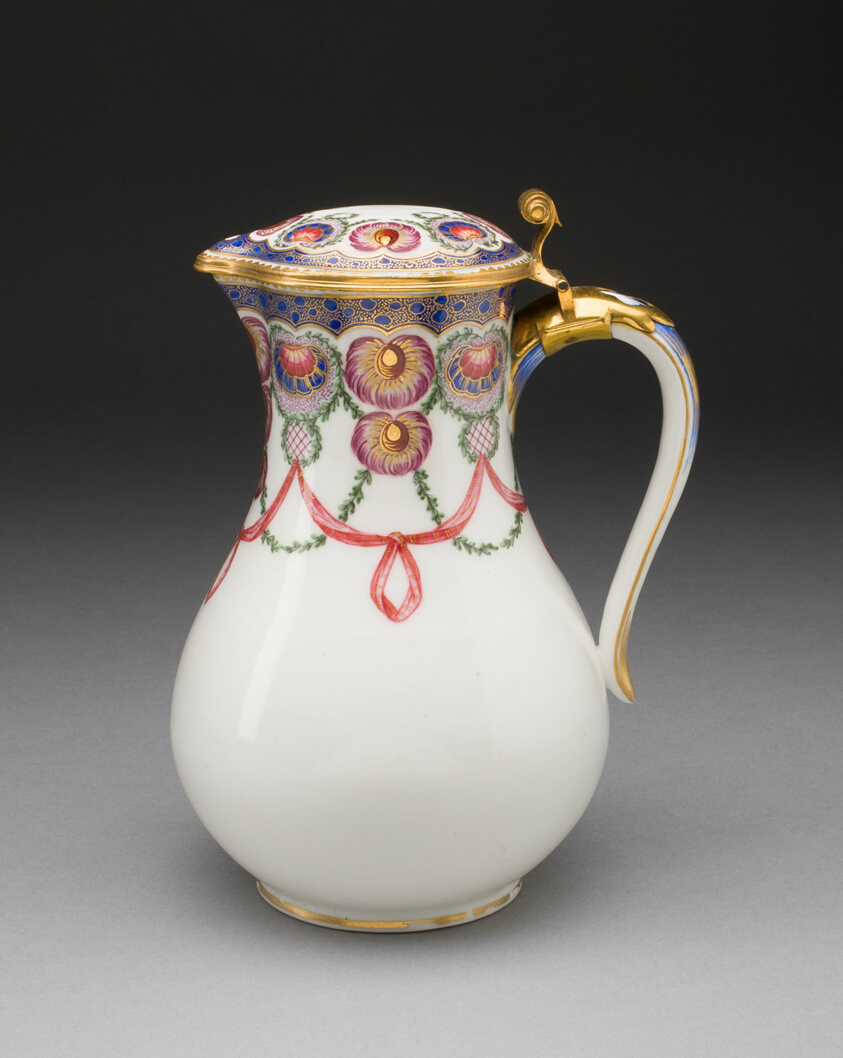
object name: Ceramics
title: Jug (Pot à l'eau tourné)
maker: Sèvres Porcelain Manufactory; French, founded 1740; Painted by Louis-Jean Thévenet (French, active 1741/45–1777)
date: 1763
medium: Soft-paste porcelain, polychrome enamels, gilding, and gilt-metal mounts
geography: Sèvres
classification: tableware; ceramics; porcelain; european decorative arts